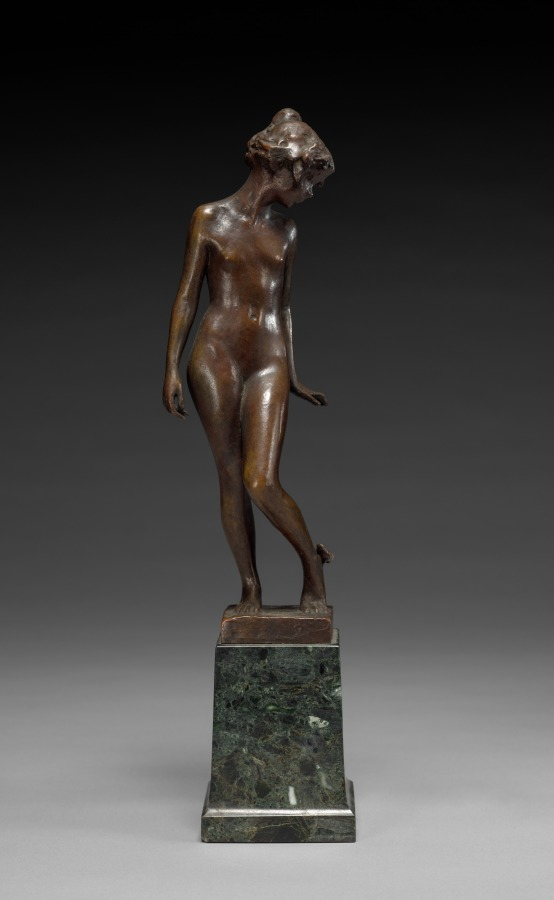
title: Butterfly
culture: America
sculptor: Emil Fuchs (American, born Austria, 1866–1929)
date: c. 1919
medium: bronze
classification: Sculpture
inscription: Signed on base: EMIL FUCHS